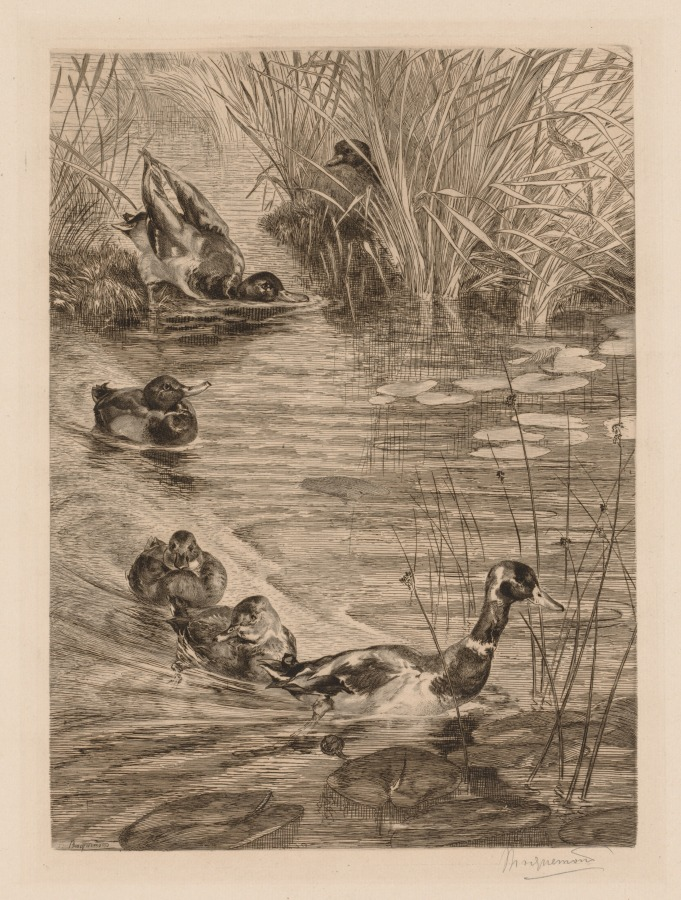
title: Ducks at play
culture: France, 19th century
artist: Félix Bracquemond (French, 1833–1914)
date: c. 1870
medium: etching and drypoint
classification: Print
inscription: signed, lower right, in graphite: Bracquemond; signed, lower left, in plate: Bracquemond